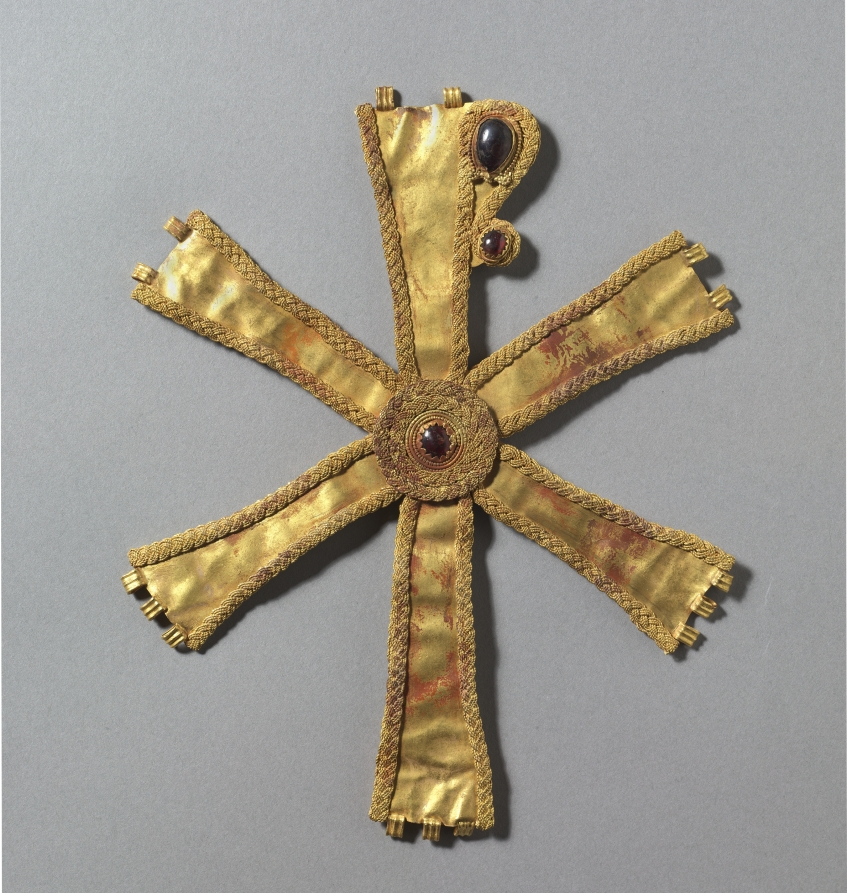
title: Monogram of Christ (Chrismon)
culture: Byzantium, Syria, early Byzantine period, 6th century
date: 500s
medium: gold sheet, gold wire, and garnets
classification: Metalwork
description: The superimposed Greek letters chi and rho, the first two letters of Christ’s name, was a popular early Christian symbol. The monogram of Christ, or chrismon, is also a powerful symbol of imperial victory: it appeared to Emperor Constantine the Great before his battle against Maxentius in ad 312, promising victory in the name of Christ. Made of gold sheet and decorated with three garnets, it may have formed the center of a golden wreath, serving as a protective device and an emblem of Christian triumph.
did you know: This image combines chi (X) and rho (P), the first two letters of Christ's name in Greek. The materials also had symbolic meaning, from the kingly gold to the deep, blood red of the garnets evoking his sacrifice.